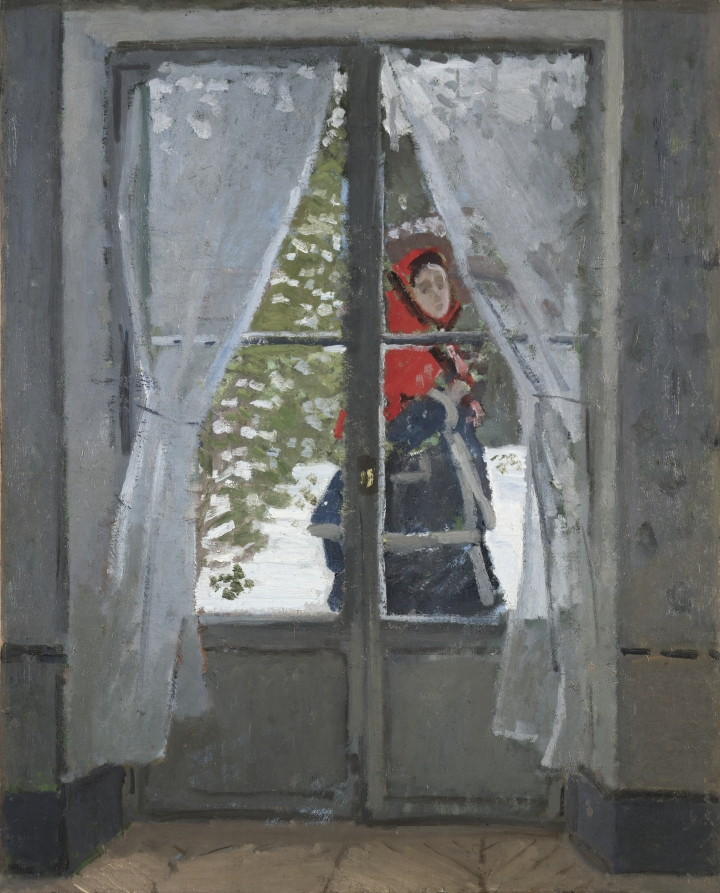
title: The Red Kerchief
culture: France, 19th century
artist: Claude Monet (French, 1840–1926)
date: c. 1868–73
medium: oil on fabric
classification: Painting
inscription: Not signed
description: This painting depicts Monet's first wife, Camille, outside on a snowy day passing by the French doors of their home at Argenteuil. Her face is rendered in a radically bold Impressionist technique of mere daubs of paint quickly applied, just as the snow and trees are defined by broad, broken strokes of pure white and green.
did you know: Madame Monet’s red cape draws the viewer’s attention beyond the glass of the French doors capturing her glance, a brief moment frozen in time. This painting was very special to Monet and he kept it with him for his entire life.